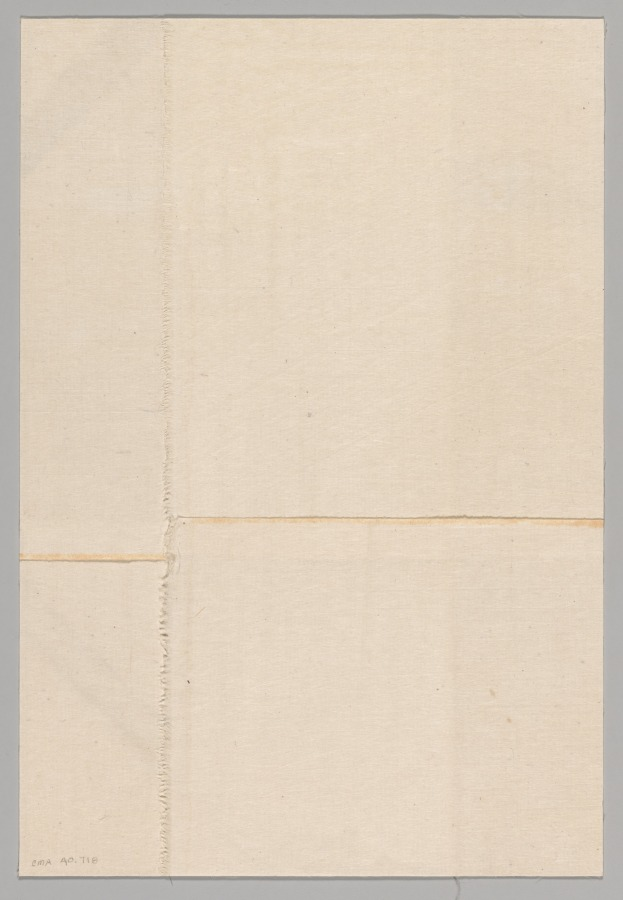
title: Woman with Papers in Mouth and Fan in Hand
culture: Japan, Edo period (1615–1868)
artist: Keisai Eisen (Japanese, 1790–1848)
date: 1789–1851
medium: color woodblock print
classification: Print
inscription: Signature: Keisai Yeisen